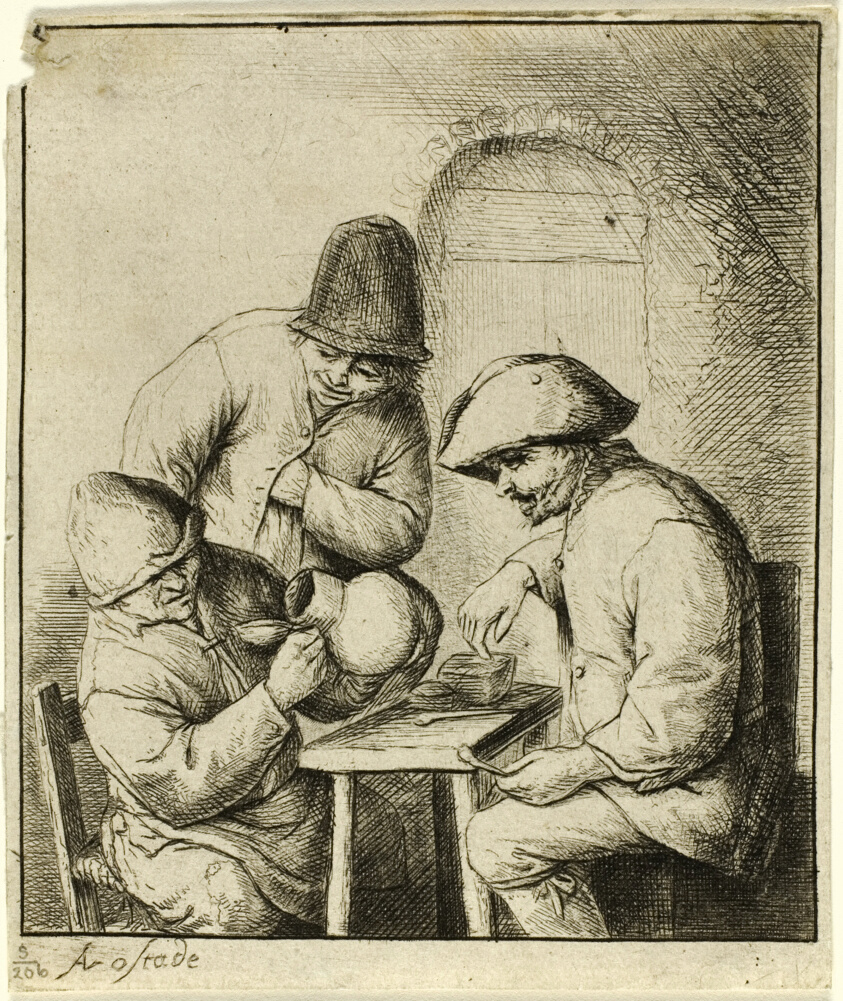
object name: Print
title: The Empty Jug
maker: Adriaen van Ostade (Dutch, 1610-1685)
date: c. 1653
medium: Etching in black on ivory laid paper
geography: Holland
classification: etching; print; prints and drawing